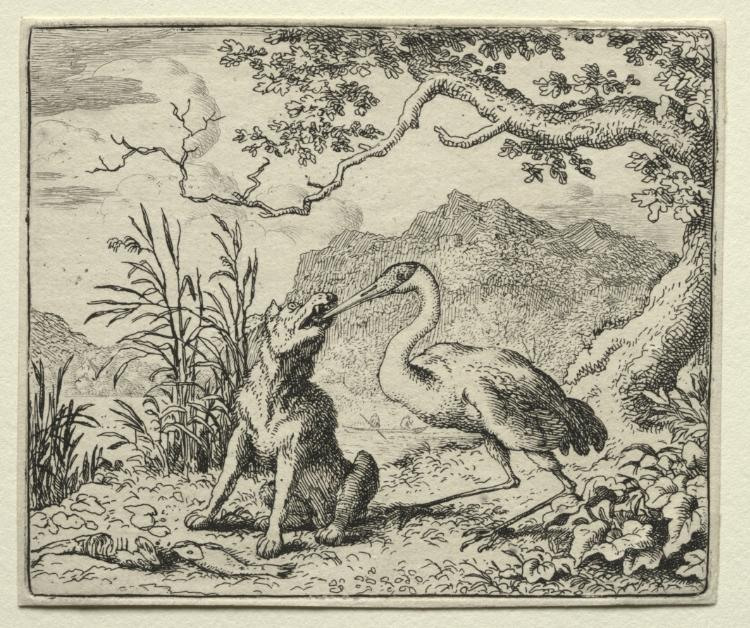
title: Reynard the Fox: The Ungrateful Wolf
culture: Netherlands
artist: Allart van Everdingen (Dutch, 1621–1675)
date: 1650–75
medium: etching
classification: Print